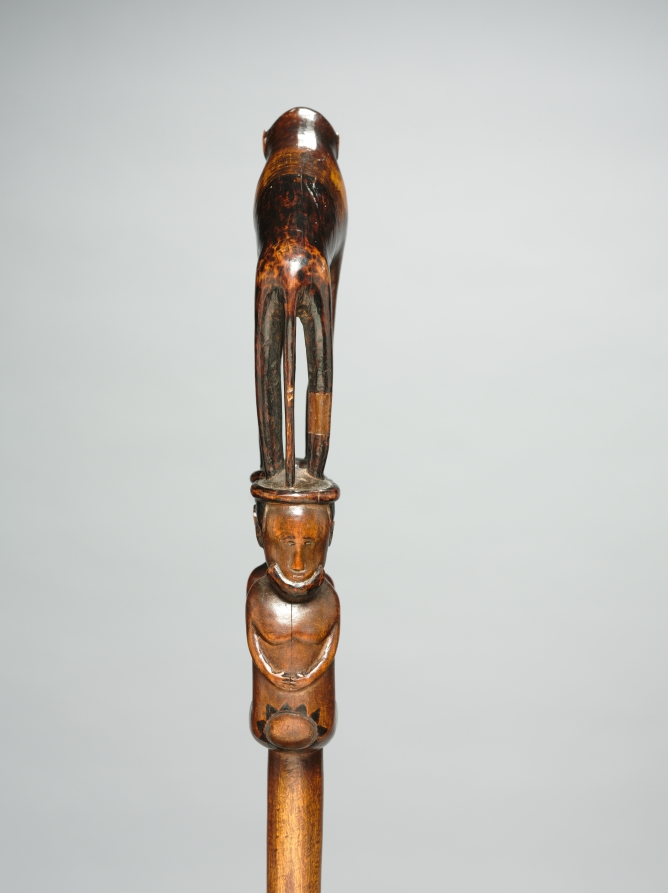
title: Staff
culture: Africa, South Africa, South Africa or Mozambique, probably Tsonga peoples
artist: The Baboon Master (probably Tsonga peoples)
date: 1800s–1900s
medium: Wood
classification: Sculpture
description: Arguably the finest surviving carving of the Baboon Master in a Western collection, this staff features exceptionally sophisticated articulation and detailing. The circular pokerwork motif on one side—which echoes the treatment of the ears on the male heads supporting the baboon—may represent a shield or a leaf. The heads feature the characteristic ornament that signifies maturity and marriage; covered with a mixture of gum, charcoal, and oil, this hairdo, called isicoco, employed a fiber or sinew ring into which the wearer’s hair was woven.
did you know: Artists working on the African continent often moved from place to place; the artist nicknamed The Baboon Master was of the Tsonga culture and worked in the Zulu kingdom.